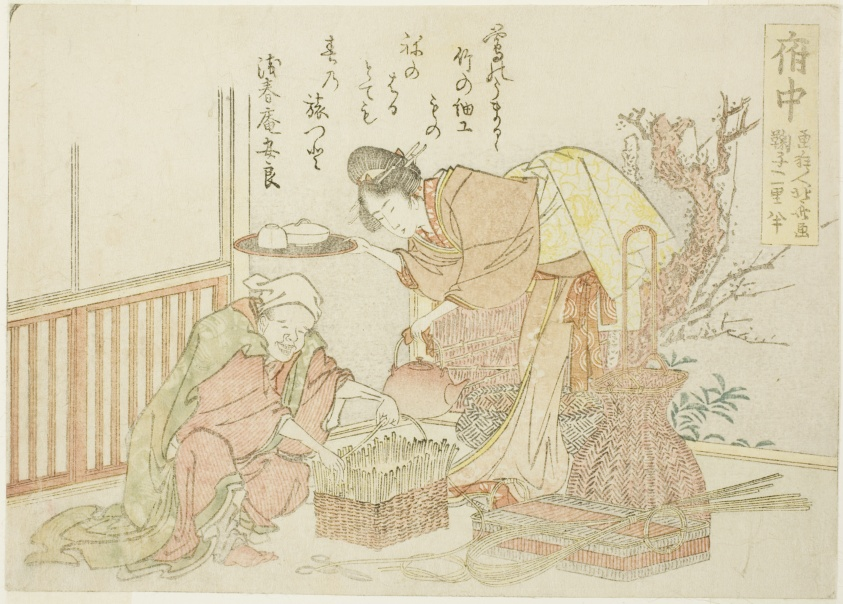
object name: Print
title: Fuchu, from an untitled series of the fifty-three stations of the Tokaido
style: Japanese (culture or style)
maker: Katsushika Hokusai 葛飾 北斎; Japanese, 1760-1849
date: c. 1804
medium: Color woodblock print; kokonotsugiri-ban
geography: Japan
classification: woodblock print; print; asian art